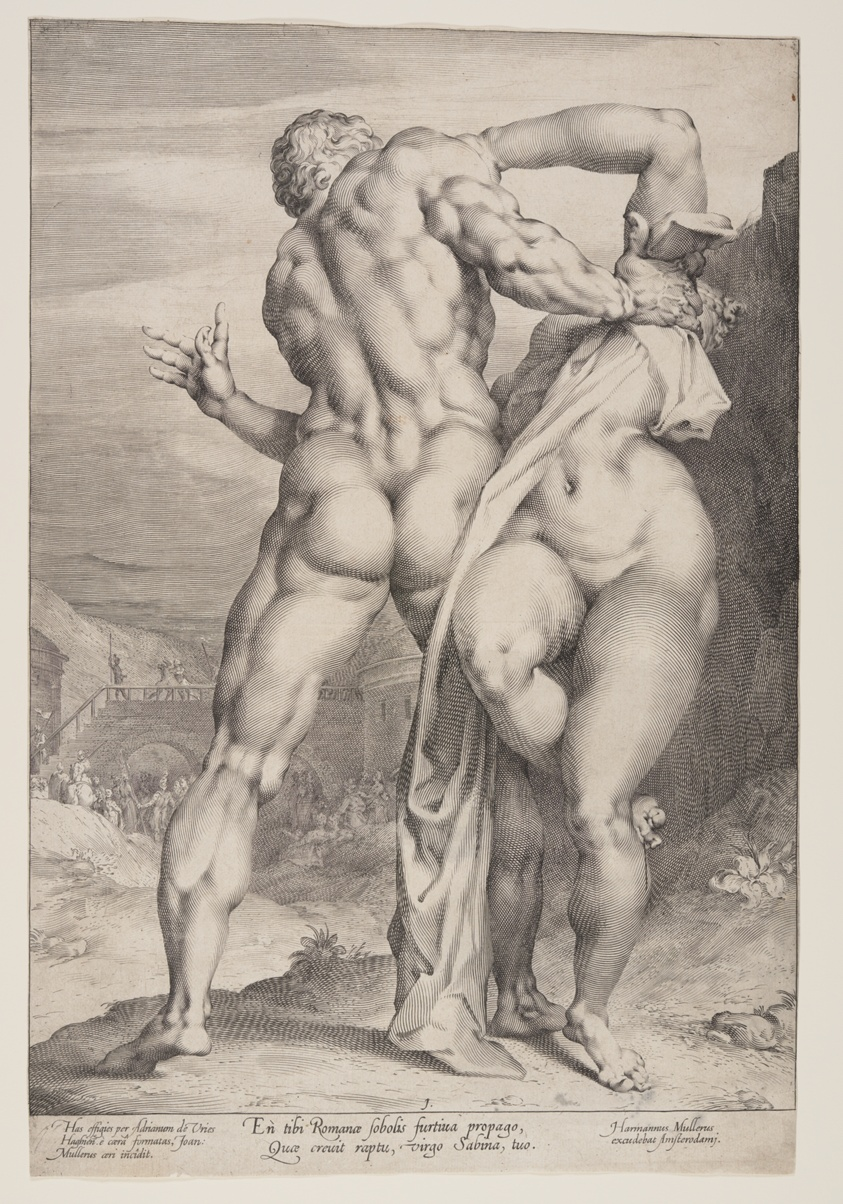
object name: Print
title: The Abduction of a Sabine Woman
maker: Jan Harmensz Muller (Dutch, 1571–1628); after Adriaen de Vries (Dutch, c. 1566–1626)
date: c. 1598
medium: Engraving on ivory laid paper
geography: Netherlands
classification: engraving; paper; print; prints and drawing